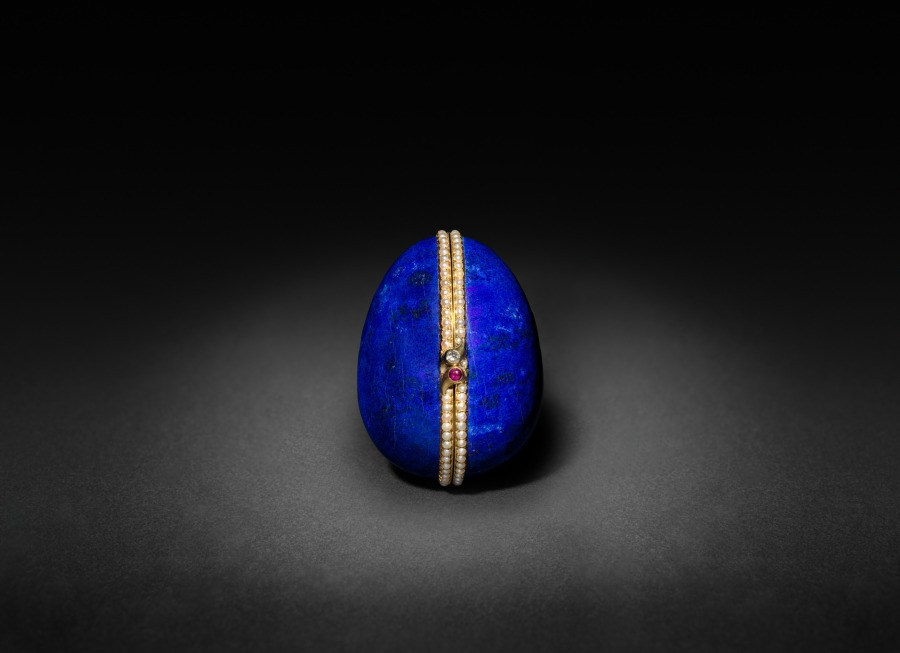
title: Lapis Lazuli Easter Egg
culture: Russia, St. Petersburg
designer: attributed to Peter Carl Fabergé (Russian, 1846–1920)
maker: attributed to House of Fabergé (Russian, 1842–1918)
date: c. 1885–90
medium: gold, enamel, lapis lazuli, pearls, diamonds, rubies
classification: Miscellaneous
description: Peter Carl Fabergé became the crown jeweler to the imperial court of Russia after he produced the very first Easter egg for Tsar Alexander III to give to his wife, Empress Marie Feodorovna. Fabergé created his celebrated Easter eggs, symbols of rebirth and renewal, as gifts for the Russian imperial family every year until he had to leave the country in 1919 after the Russian Revolution. Made of gold and lapis lazui from the Ural Mountains, this egg conceals a delightful surprise within of an imperial crown and a tiny ruby or pink sapphire on a chain.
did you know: This egg may have been made for one of the tsar's relatives very early in the run of Fabergé's production of Easter eggs.